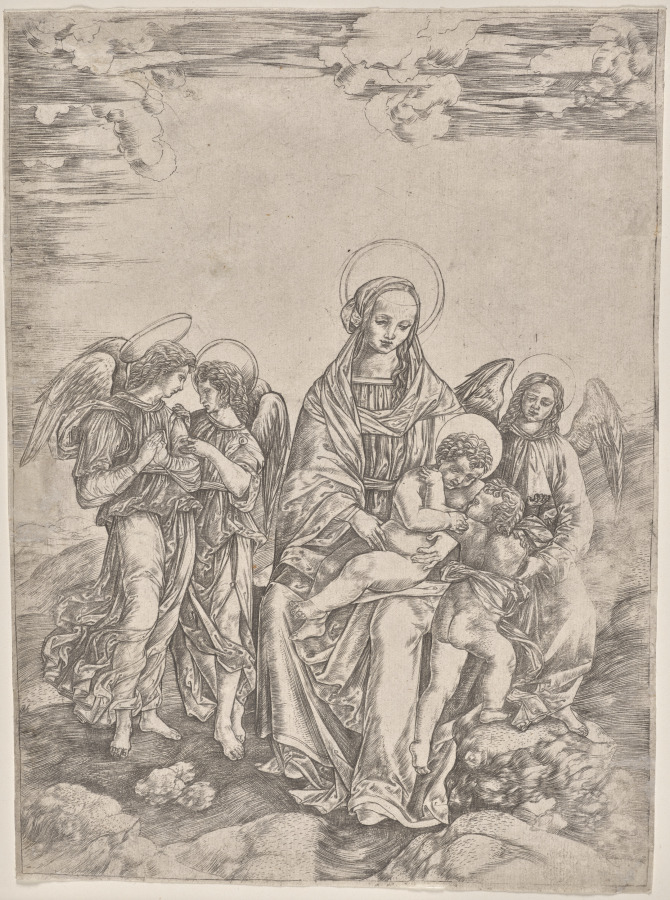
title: Virgin and Child with the Infant Saint John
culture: Italy, 16th century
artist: Cristofano Robetta (Italian, 1462–1534)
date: 1500–1520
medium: engraving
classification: Print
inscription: Written in pencil on verso: "C9603"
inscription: Written in pencil on verso: "B13 (?)"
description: Active in the early 1500s, the Florentine engraver Cristofano Robetta relied on paintings, frescoes, and works on paper by both Italian and northern European artists, borrowing motifs, figures, and settings with varying degrees of faithfulness. Paintings and drawings by the Florentine artist, Filippino Lippi, were a primary source of inspiration. In this engraving, the central figures of the Virgin, Child, and Saint John derive from Filippino’s Holy Family tondo, though the printmaker replaced the Saints Margaret and Joseph with angels.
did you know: Trained as a goldsmith, Robetta’s engraving style consists of extremely fine lines combined with crosshatching and dots.